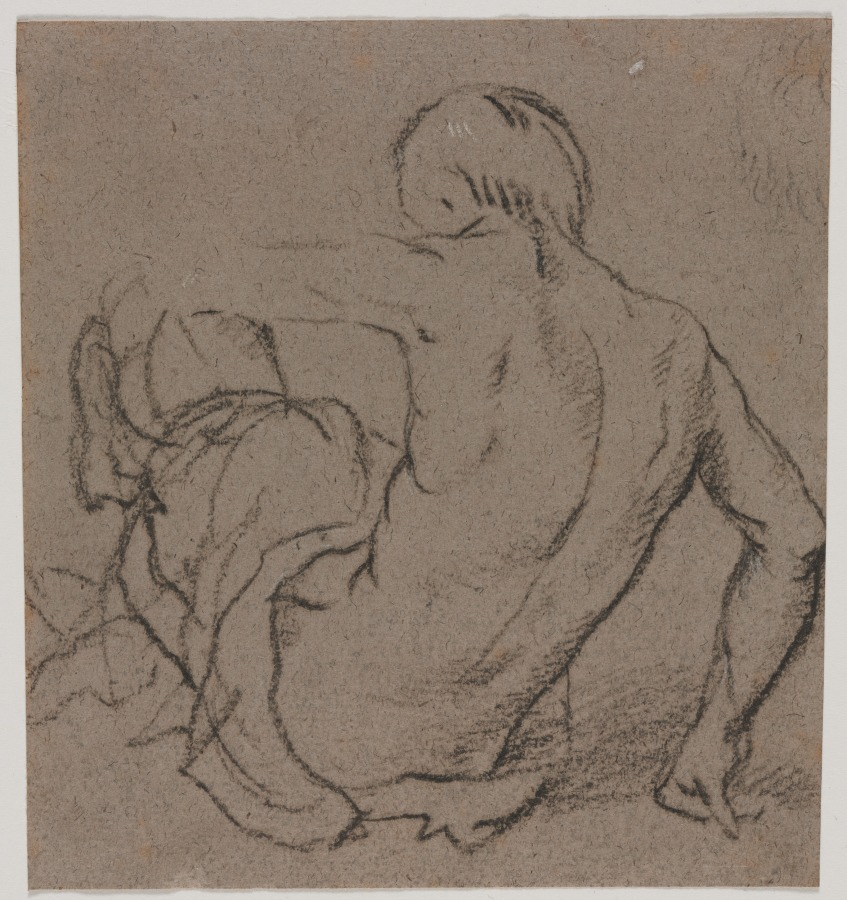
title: Man Seated on the Ground, Seen from Behind (recto); Sketch (verso)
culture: Italy, 16th century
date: 1500s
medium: brush and black wash heightened with traces of white gouache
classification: Drawing